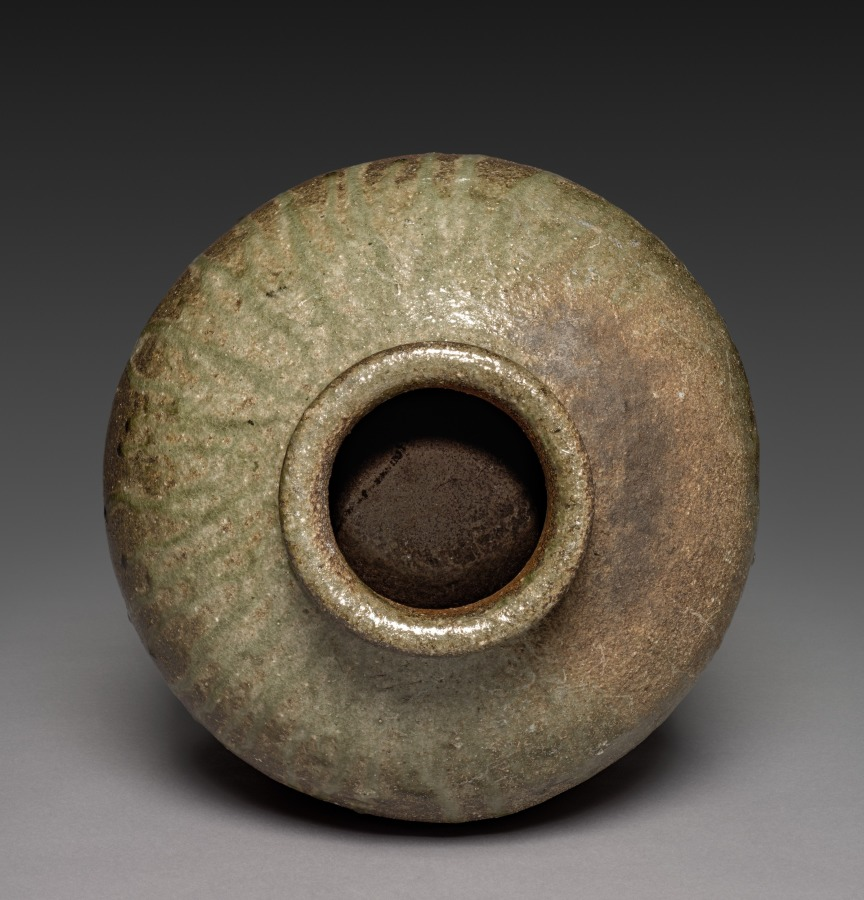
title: Water Jar: Ko Tamba ware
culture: Japan, Muromachi period (1392–1573)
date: mid-1500s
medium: stoneware with natural green ash glaze (Tamba ware)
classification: Ceramic